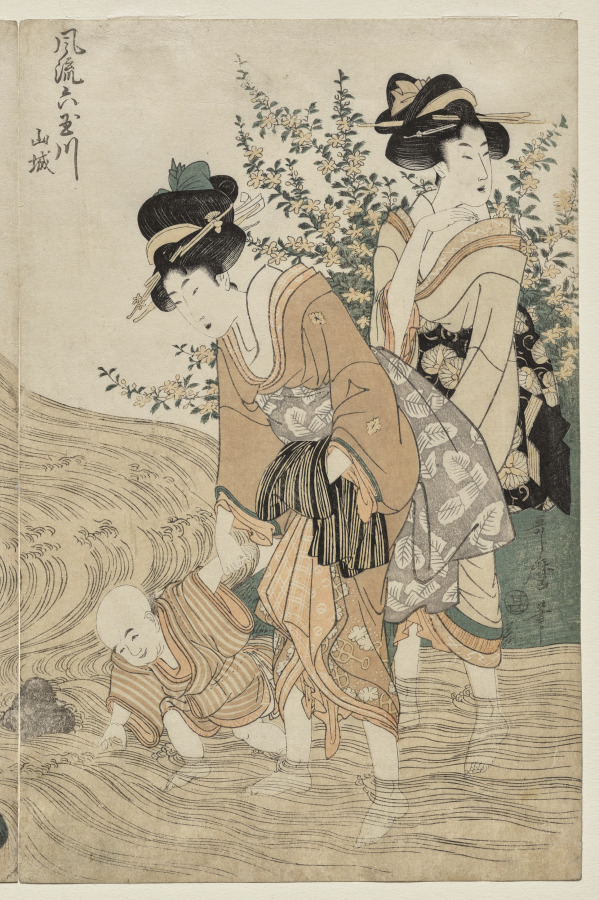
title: Yamashiro Province from the series Fashionable Six Jewel Rivers (Furyu Mu Tamagawa)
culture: Japan, Edo period (1615–1868)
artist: Kitagawa Utamaro (Japanese, c. 1754–1806)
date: c. 1804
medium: polychrome woodblock print; ink and color on paper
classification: Print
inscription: Signature: Utamaro hitsu Publisher: Maruya Jimpachi (emblem)